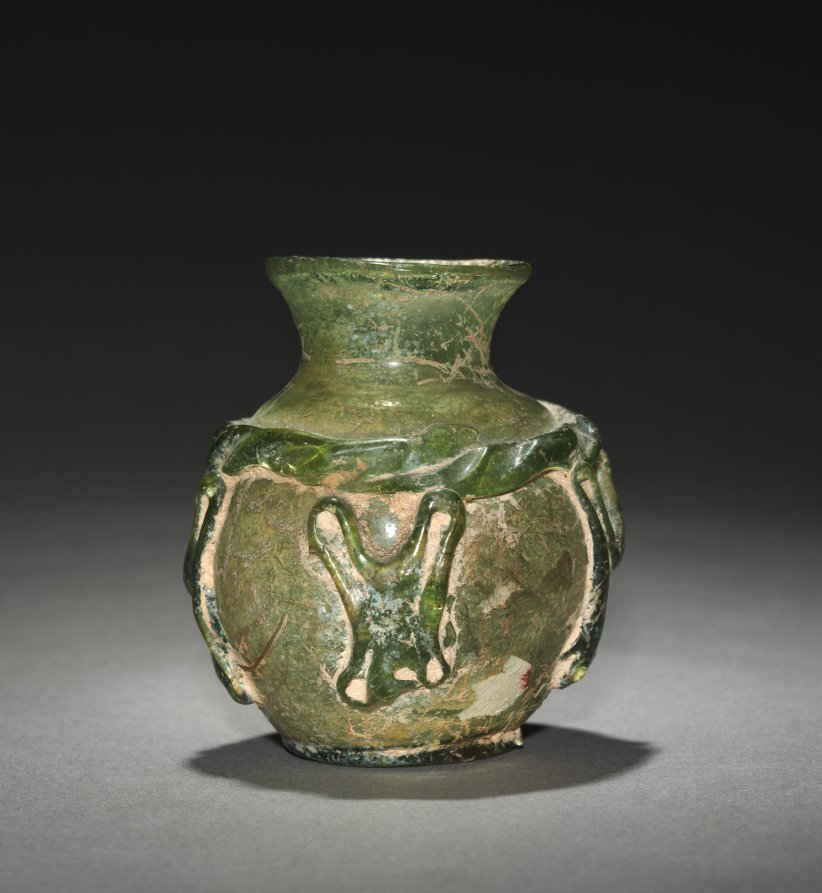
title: Vase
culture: Early Islamic, Eastern Mediterranean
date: 600s–800s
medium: glass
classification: Glass